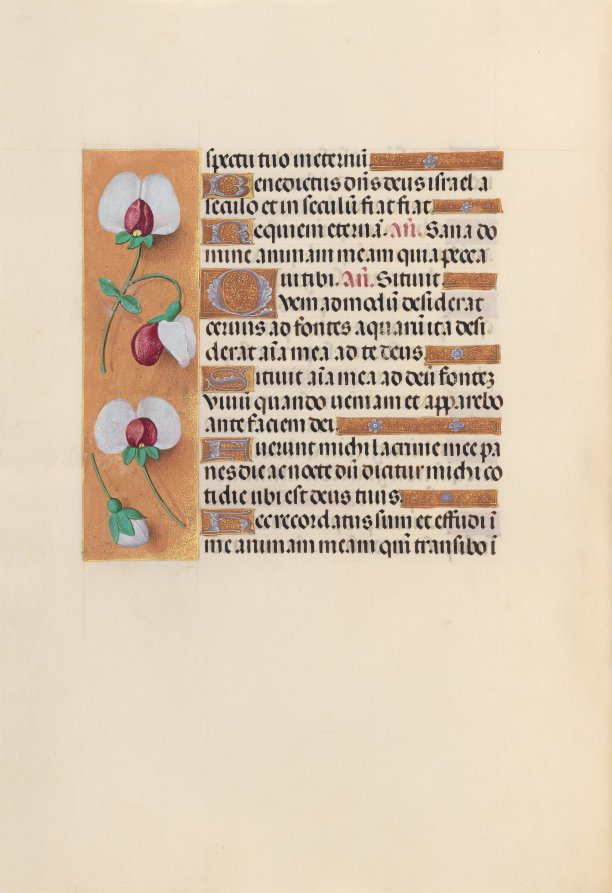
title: Hours of Queen Isabella the Catholic, Queen of Spain: Fol. 242v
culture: Flanders, Ghent and Bruges, late 15th century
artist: Master of the First Prayerbook of Maximillian (Flemish, c. 1444–1519)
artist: and Associates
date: c. 1500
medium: ink, tempera, and gold on vellum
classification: Bound Volume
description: This manuscript was illuminated by a circle of at least five highly organized manuscript painters active in the Flemish cities of Ghent and Bruges. The principal illuminator was Alexander Bening, who painted the majority of the book's miniatures. Manuscripts produced by this circle of artists are renowned for the decoration of their borders, which typically feature a rich variety of realistically-painted flowers, birds, and butterflies. This prayer book, called a book of hours, was intended not for a cleric, but for the private devotions of a lay person-in this case, Isabella the Catholic, Queen of Spain (1451-1504). Isabella's coat of arms embellishes the book's frontispiece. It is unlikely that the book was commissioned by the Queen herself; rather, she probably received it as a diplomatic gift from someone courting her patronage, perhaps Cardinal Francisco Jimenez de Cisneros. A Franciscan friar, Jimenez was dependent upon Isabella for his advancement, first to the post of Queen's confessor in 1492, and then to Archbishop of Toledo in 1495.